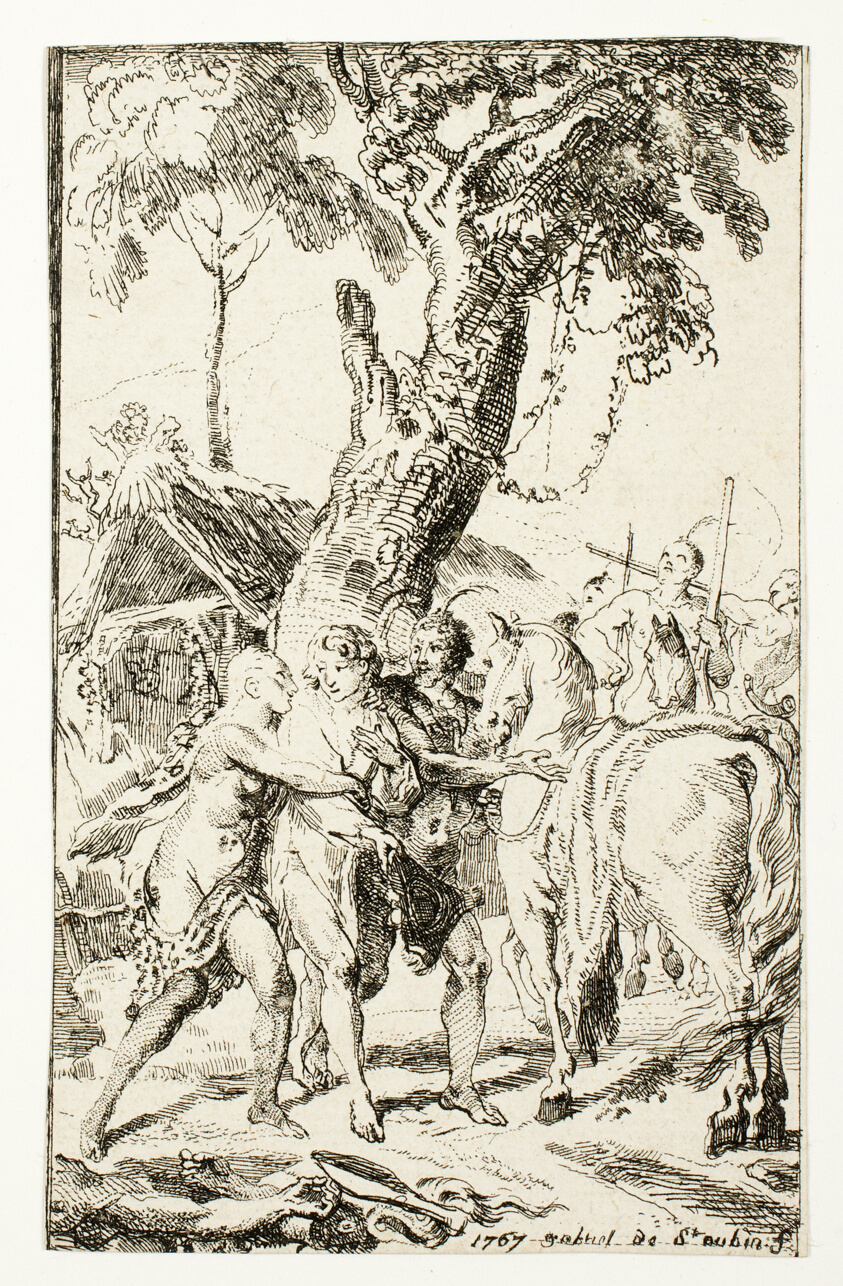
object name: Print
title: The Escape of M. de Belle-Isle, Prisoner in the Attakapas, plate four from Les Nouveaux Voyages aux Indes Occidentales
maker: Gabriel Jacques de Saint-Aubin (French, 1724-1780)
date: 1767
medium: Etching on cream laid paper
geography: France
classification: etching; print; prints and drawing